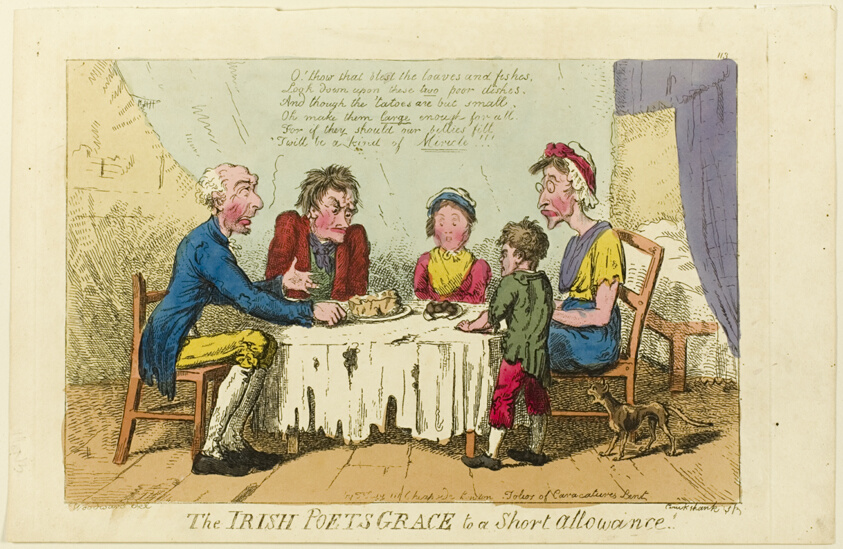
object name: Print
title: Irish Poets Grace to Short Allowance!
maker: Isaac Cruikshank (English, 1764-1811); published by Thomas Tegg (English, 1776-1846)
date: 1805–1810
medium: Etching with hand-coloring on wove paper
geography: England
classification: etching; print; prints and drawing